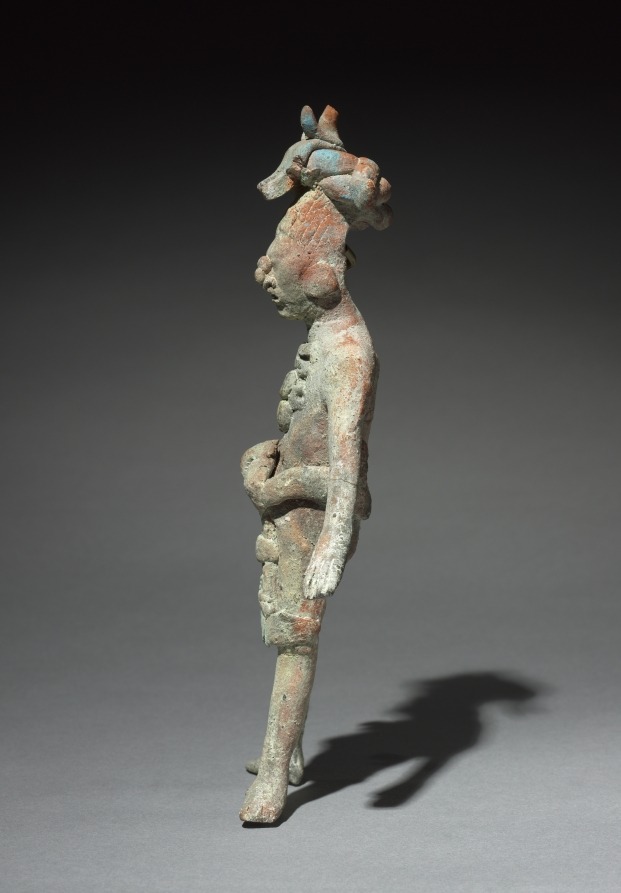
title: Jaina Figure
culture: Maya, Late Classic, 7th-8th Century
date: 600s-700s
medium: terracotta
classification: Sculpture